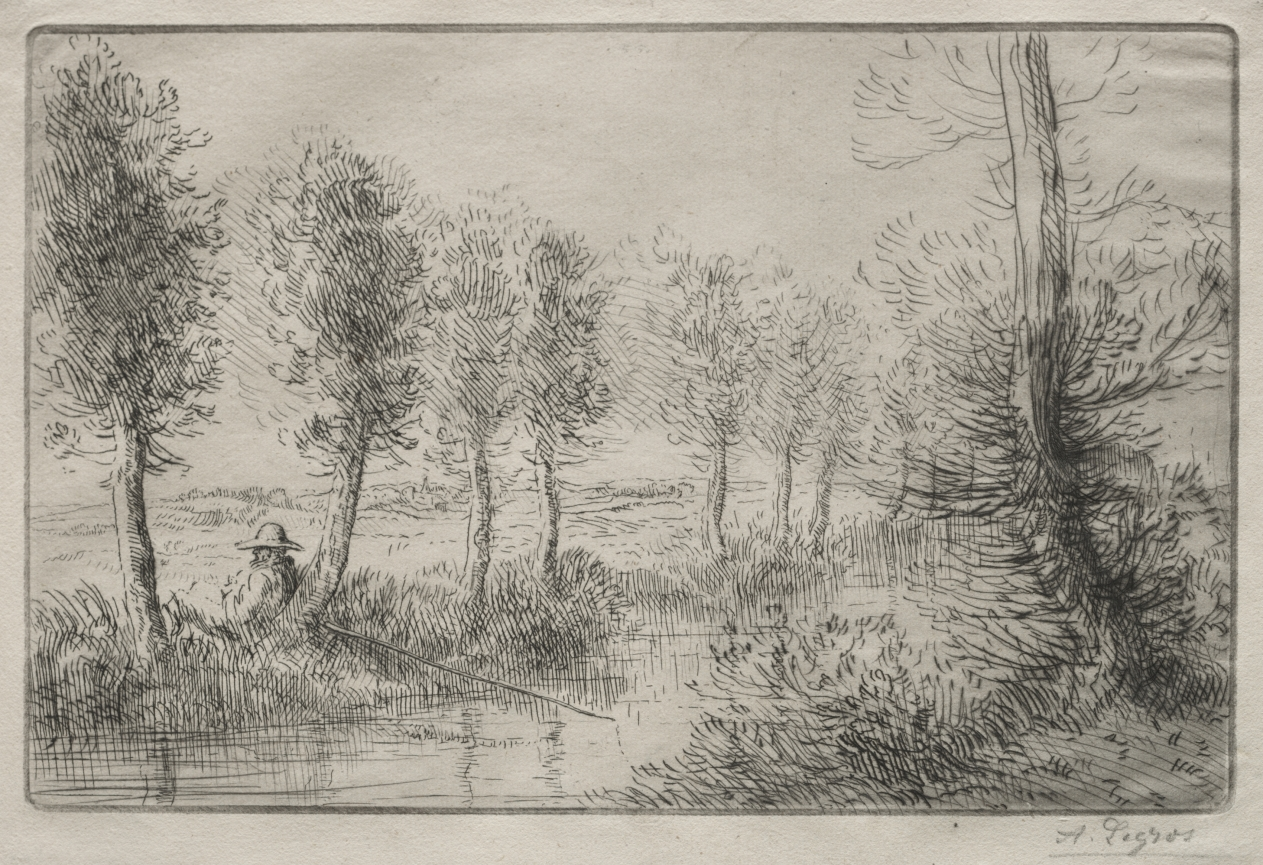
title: Near the Mill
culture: France, 19th-20th century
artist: Alphonse Legros (French, 1837–1911)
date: c. 1857–1911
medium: etching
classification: Print